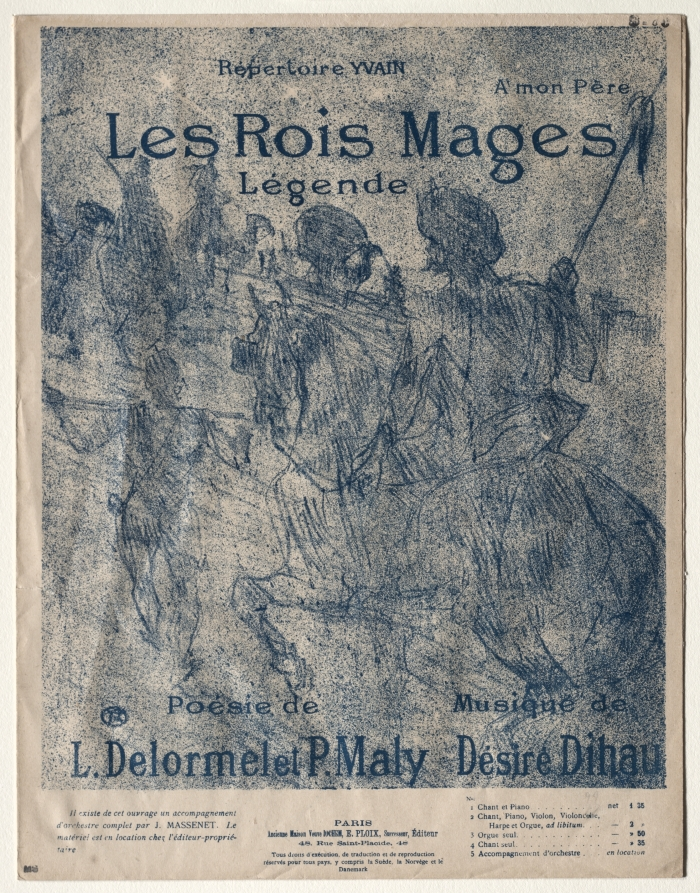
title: Les Rois Mages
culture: France, 19th century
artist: Henri de Toulouse-Lautrec (French, 1864–1901)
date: 1899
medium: lithograph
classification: Print